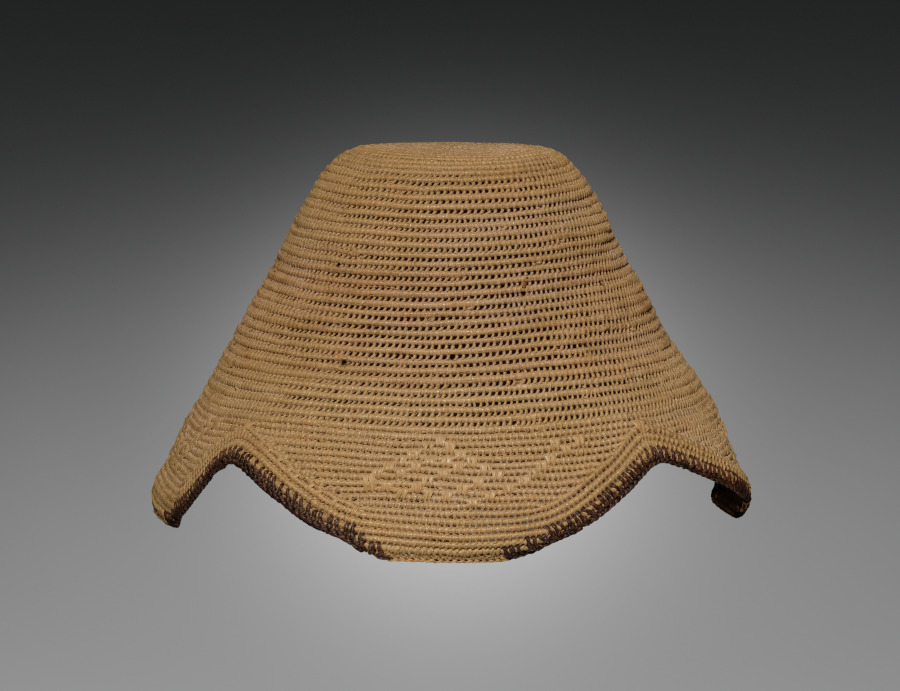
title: Hat (laket)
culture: Africa, Central Africa, Democratic Republic of the Congo, Kuba-style maker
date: early 1900s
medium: Raffia and dye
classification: Garment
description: Titled Kuba men and prominent women wear the laket, a small ornate dome-shaped hat. An essential fashion item of adult men in good social standing, it focuses special attention on the head as a significant marker of individual identity, ethnic affiliation, status, and role in society. This prestige object is secured on the crown of the head with a nine-and-a-half-inch metal pin that pierces through the hat onto a clump of hair. This laket is made from raffia palm fiber coiled into threads and woven in different patterns. There are two examples of the laket: the plain type with the flat top, and the more elaborate type called the laket mishiing.